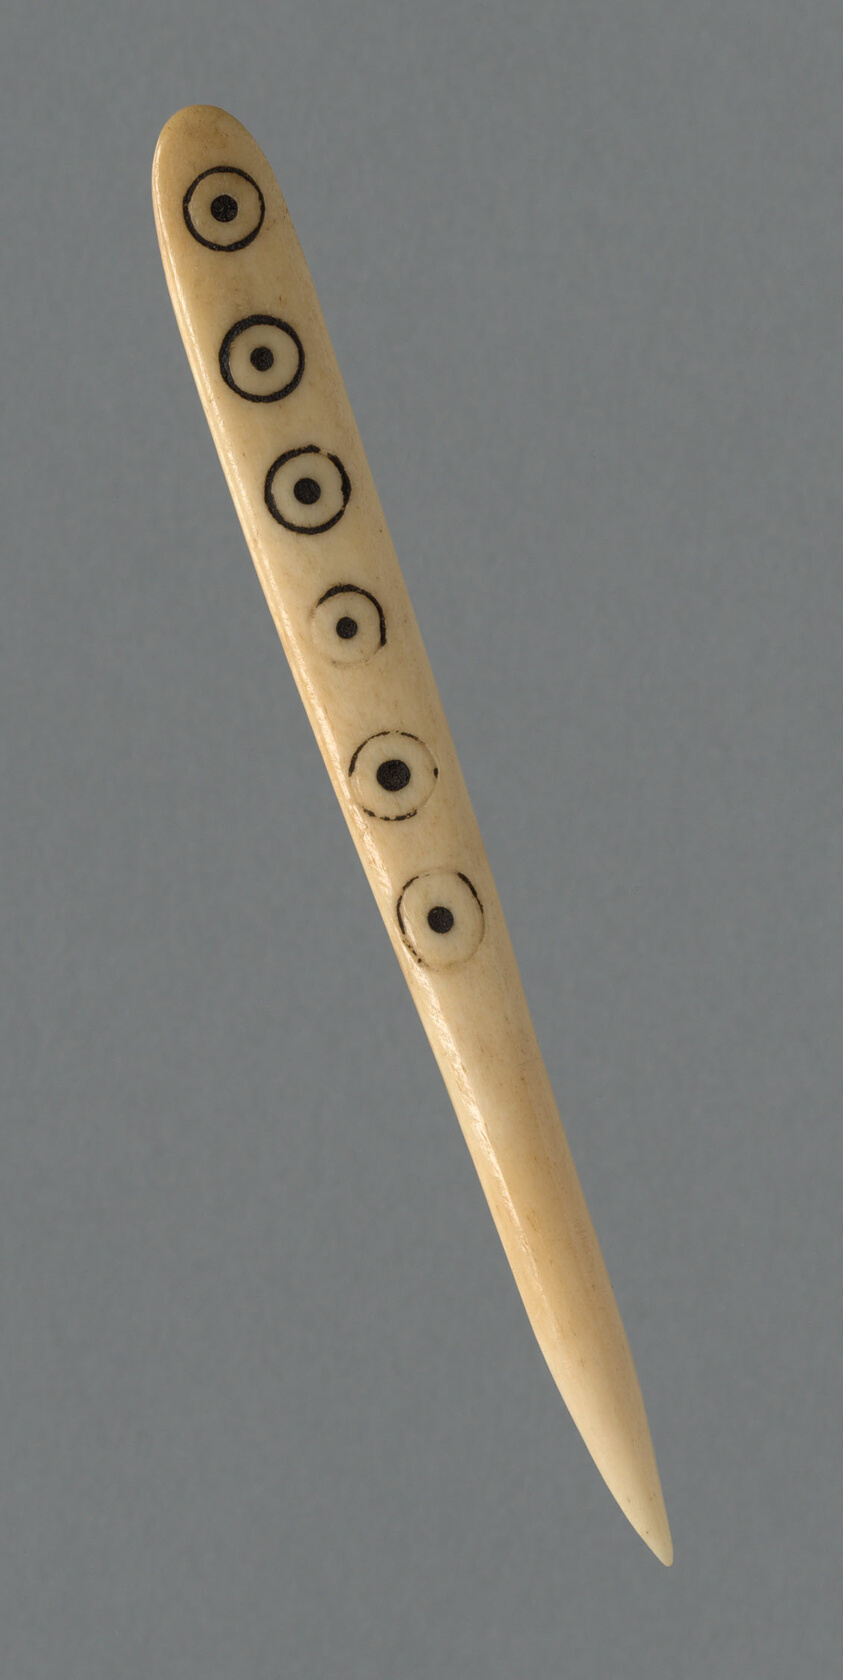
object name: non-art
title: Bone Pick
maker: Peru, Probably central coast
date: 1000/1476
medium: Bone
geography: Peru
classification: textile; textile working equipment; weaving